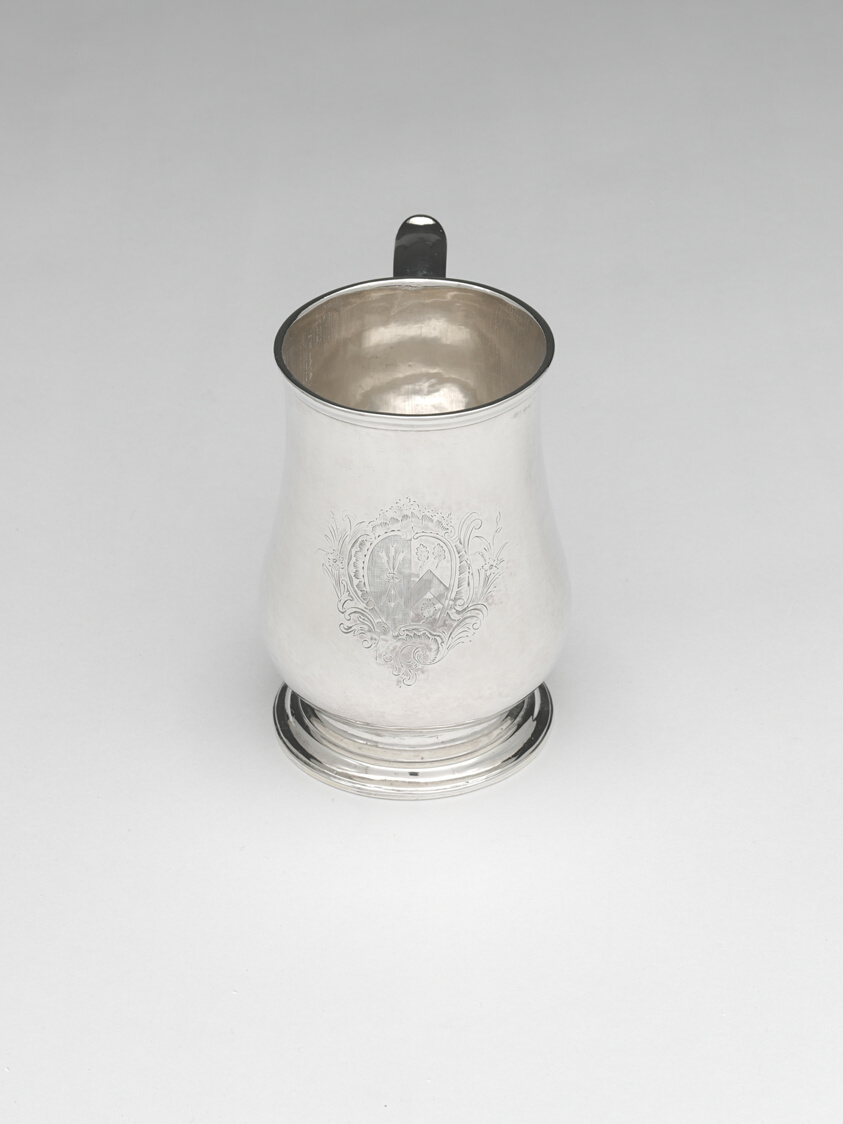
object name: Metalwork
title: Cann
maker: William Cowell Jr.; American, 1713–1761; Boston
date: 1735–50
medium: Silver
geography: Boston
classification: drinking vessel; silver; american decorative arts; american arts; decorative arts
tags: dining, drinking